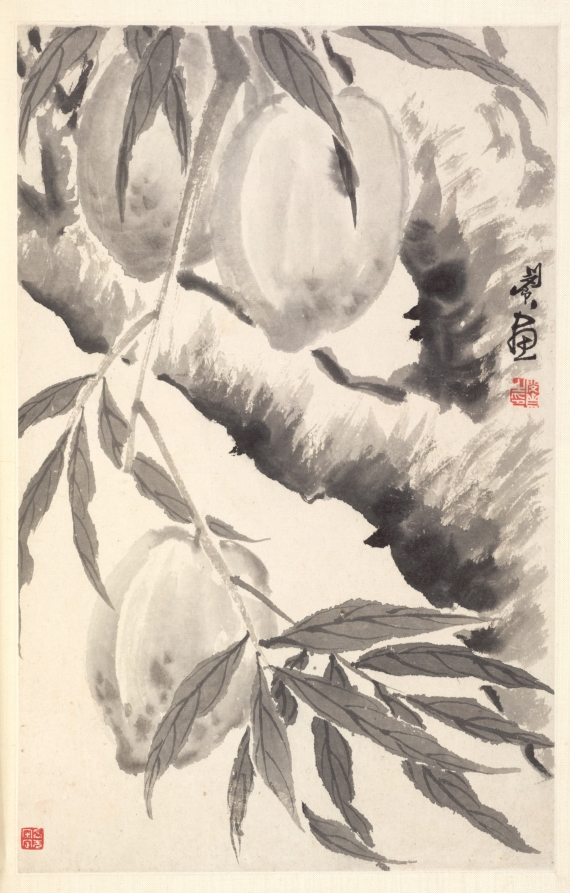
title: Peaches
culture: China, Qing dynasty (1644-1911)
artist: Min Zhen (Chinese, 1730–after 1788)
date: 1788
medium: album leaf, ink on paper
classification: Painting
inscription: Inscription by Min Chen on the last leaf: I have a habit of collecting strange rocks. My friend Tai-li shan-jen* treasures my paintings as much as I treasure strange rocks. Once we agreed to exchange what we love with each other. However, my busy activities have kept me from carrying this out. This summer I realized that this strange rock has been sitting in my studio for five years, so I painted this to fulfill my old promise. As a record, I chose the grotesque cliff in the last scene of this twelve-leaf album. Cheng-chai, Min Chen inscribed this on the sixth day of the sixth month [July 9] of the wu-shen year [1788]. * Tai-li shan-jen is Wang Li [tzu: Li-fu] tr. Hou-mei Ishida Six seals appearing on the leaves: Min Chen, Cheng-chai, Ching-ch'iao, Chen, Liao-t'ang, Min Chen chih-yin.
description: Min Zhen, who was orphaned at age 12 and developed an eccentric personality, was trained by Tang Yin (1682–1756), a writer, playwright, and superintendent of the imperial porcelain workshops in Jingdezhen. The connection to him may have enabled Min to stay in Beijing for a decade from around 1773. It is not clear whether he ever resided in Yangzhou, but his style is in many instances reminiscent of that of Yangzhou artist Huang Shen. This album demonstrates Min’s versatility and mature style in the last years of his life.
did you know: The peach is a symbol of immortality.